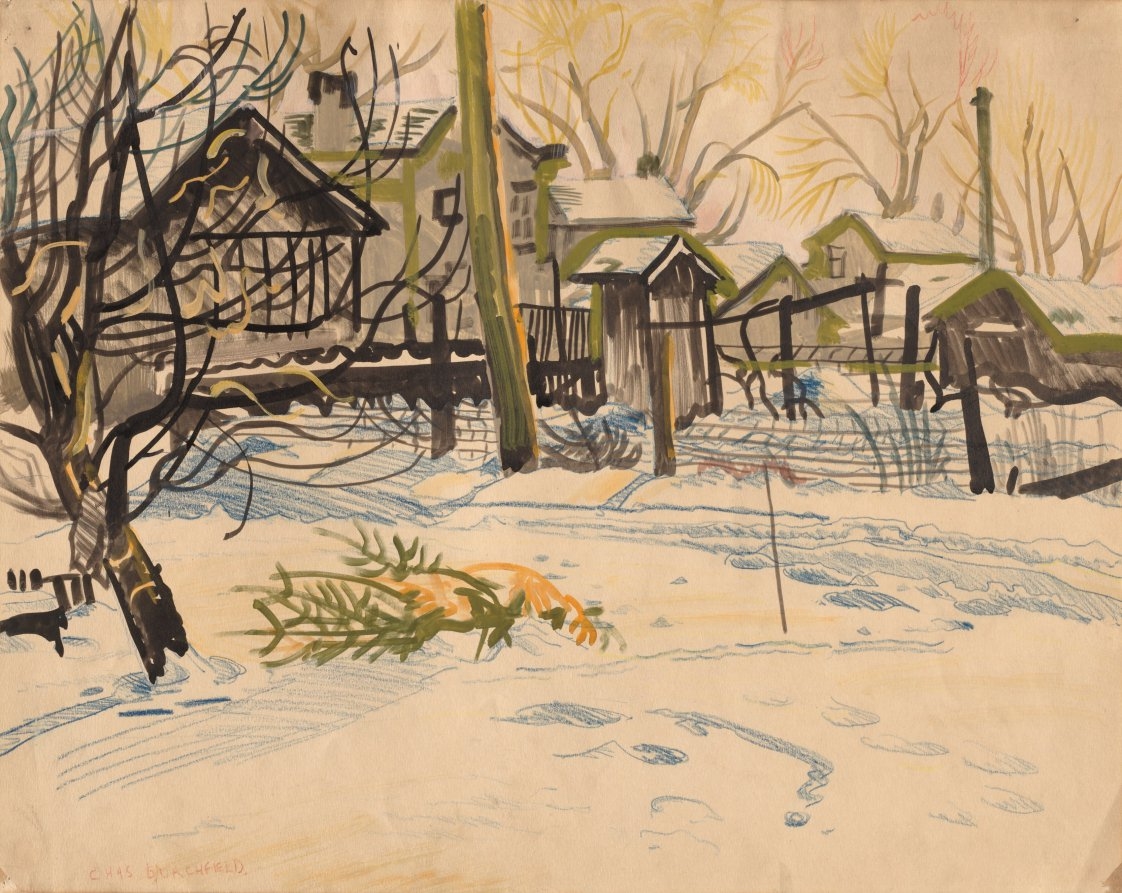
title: Backyards in Winter (Castoff Christmas Tree)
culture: America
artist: Charles Burchfield (American, 1893–1967)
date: January 1917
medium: watercolor, gouache, blue and orange crayons, and black wash on wove paper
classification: Drawing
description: In this drawing, the gray and brown tones of a row of houses are interrupted by the bright green and yellow of a discarded Christmas tree. The work was created in the same year as Church Bells Ringing, where a Christmas tree visible through a window was meant to contrast the work’s foreboding mood. This earlier image similarly suggests Burchfield’s passion for his favorite holiday, which he saw as a symbol of goodness.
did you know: Christmas trees recurred throughout Burchfield's work around this time.